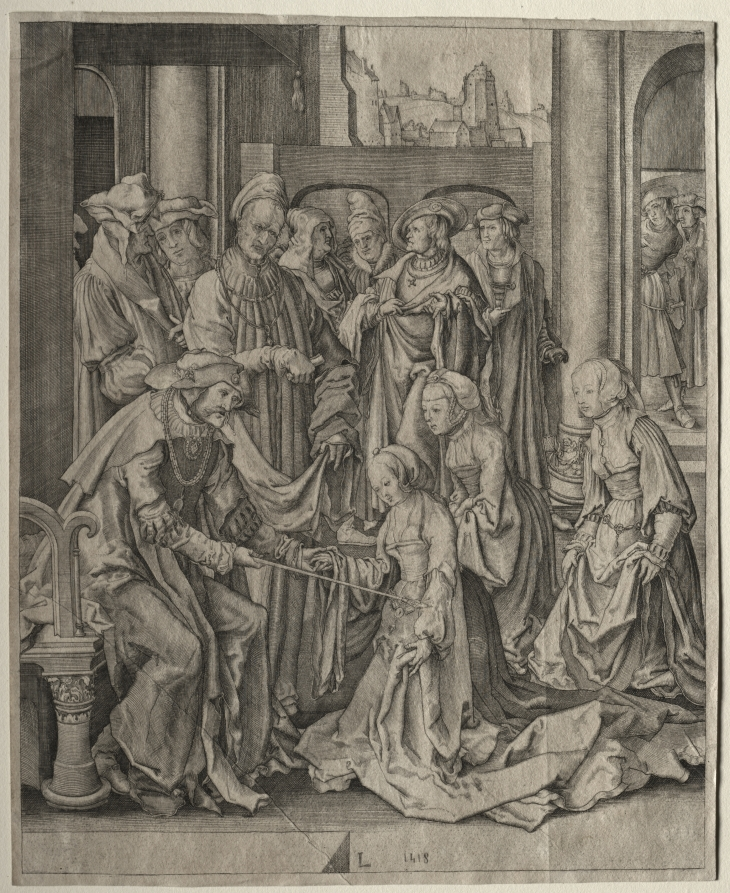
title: Esther before Ahasuerus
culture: Netherlands, 16th century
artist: copy after Lucas van Leyden (Netherlandish, 1494–about 1533)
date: 1518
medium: engraving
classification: Print